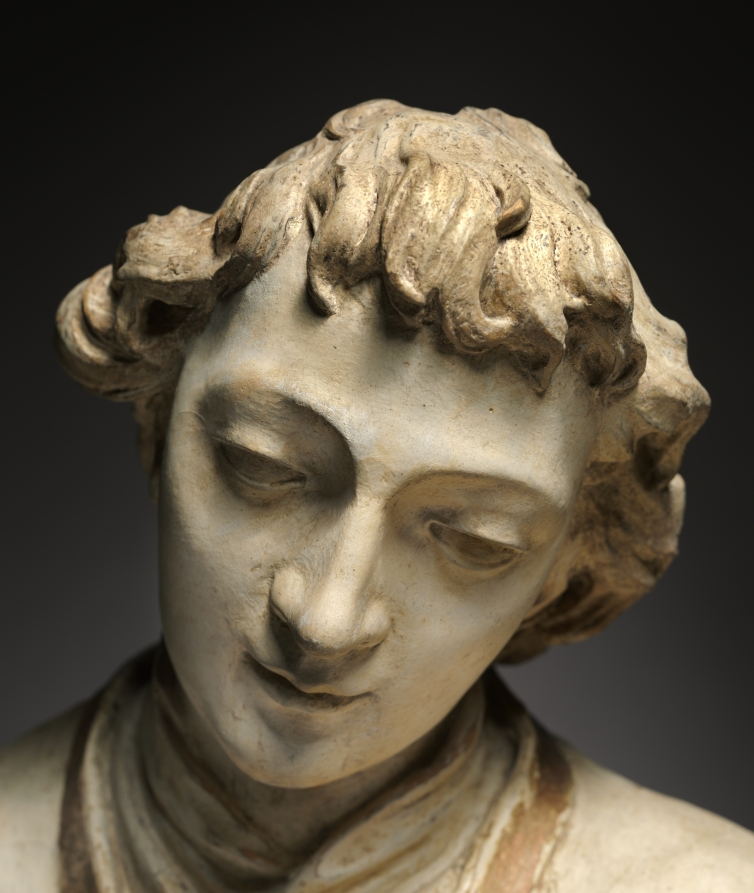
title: Kneeling Saint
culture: Germany, Munich, second half 18th century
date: 1750–1800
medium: painted and gilded wood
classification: Sculpture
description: This serene figure would originally have been part of a larger group, perhaps shown kneeling in adoration of Christ or the Virgin. He wears a knee-length dalmatic, the ecclesiastical dress of deacons (ordained ministers in the Catholic Church). Saints Lawrence and Stephen were among the most popular deacon saints, but lacking an identifying attribute—probably once attached to the saint’s outstretched hand—it is not possible to associate this figure with a specific saint.